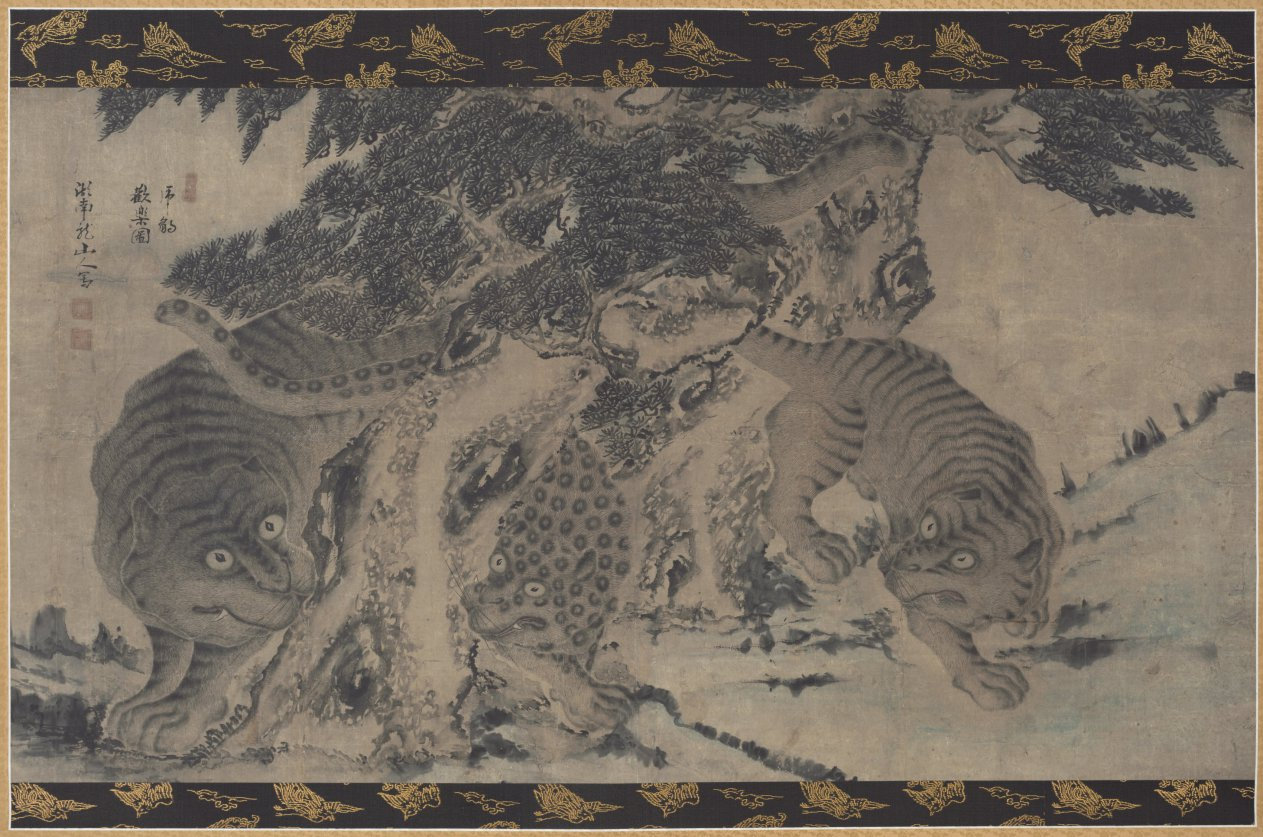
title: Tigers and Leopard Frolicking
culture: Korea, Joseon dynasty (1392–1910)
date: 1700s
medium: Hanging scroll; ink on paper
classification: Painting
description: This monochrome composition depicts a tiger and her young playing at stalking one another in a stand of pine. Tigers, considered messengers of mountain spirits, and are often paired with leopards, mistakenly thought to be baby tigers. The signature written at the upper left of the painting reads "The mountain recluse of Honam," possibly referring to a painter from Jeolla province in Korea.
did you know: Korean artists during the Joseon dynasty (1392–1910) often described leopards as baby tigers, explaining why in this painting tigers and leopards are shown together as a family.